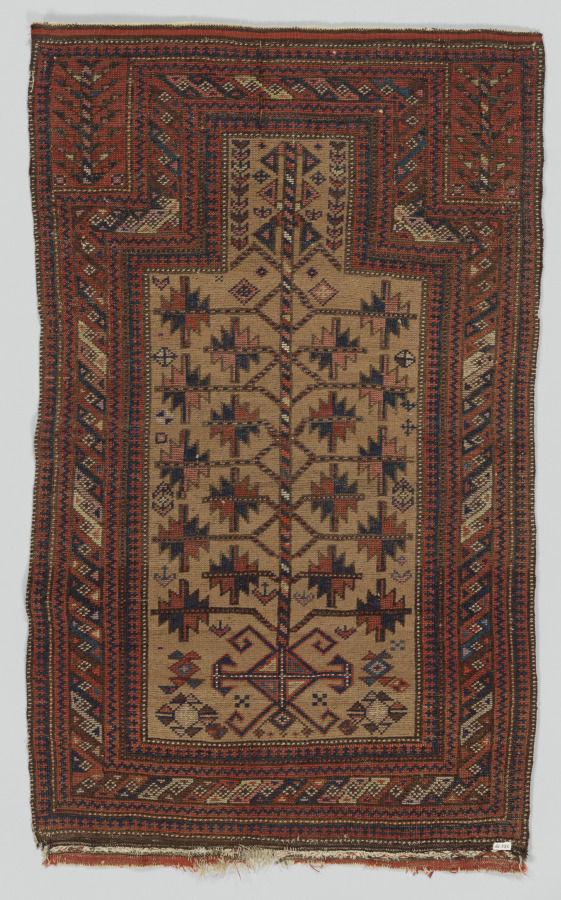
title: Carpet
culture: Iran, Vicinity of Mashhad (Baluchistan), 20th century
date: 1900s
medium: senna knot: wool, cotton, and camel hair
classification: Carpet